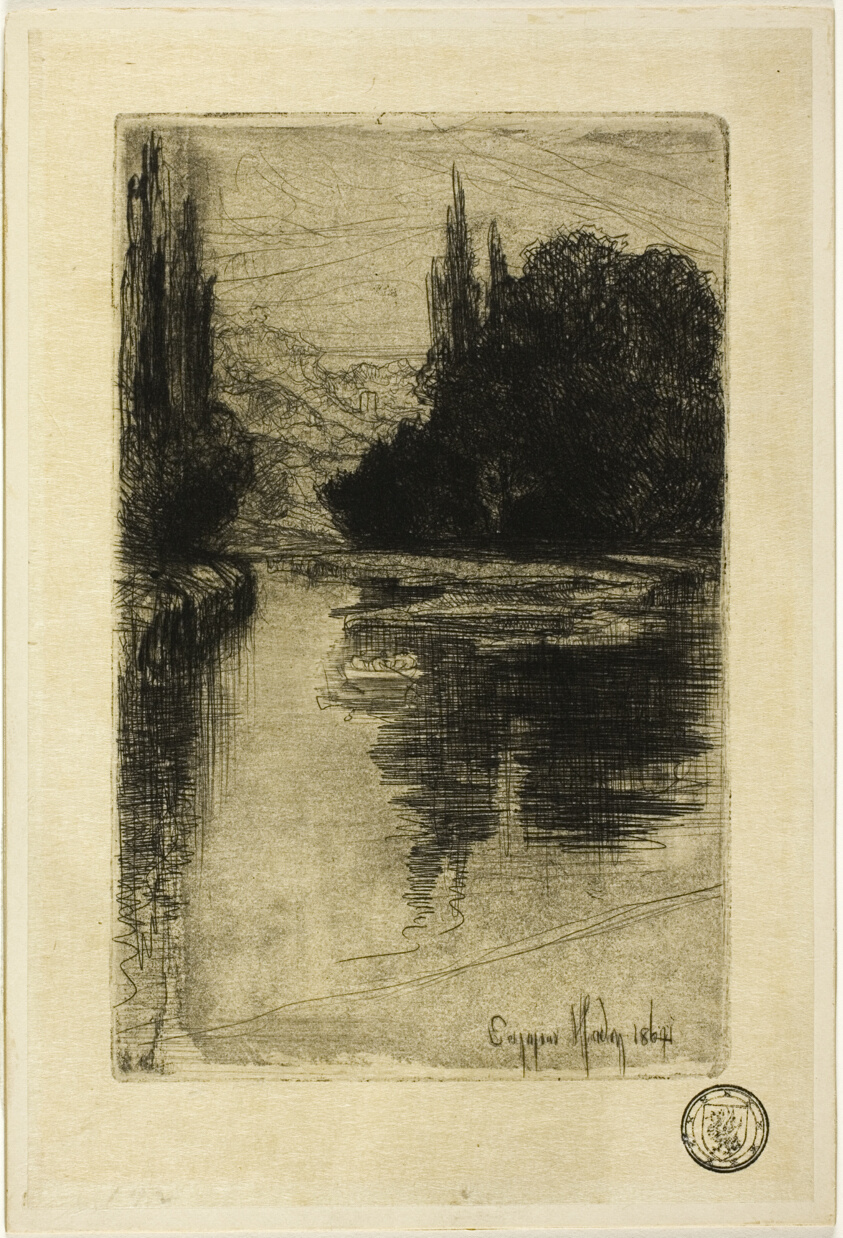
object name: Print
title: Evening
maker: Francis Seymour Haden (English, 1818-1910)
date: 1864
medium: Etching with drypoint and foul-biting on cream wove paper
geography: England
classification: etching; print; prints and drawing